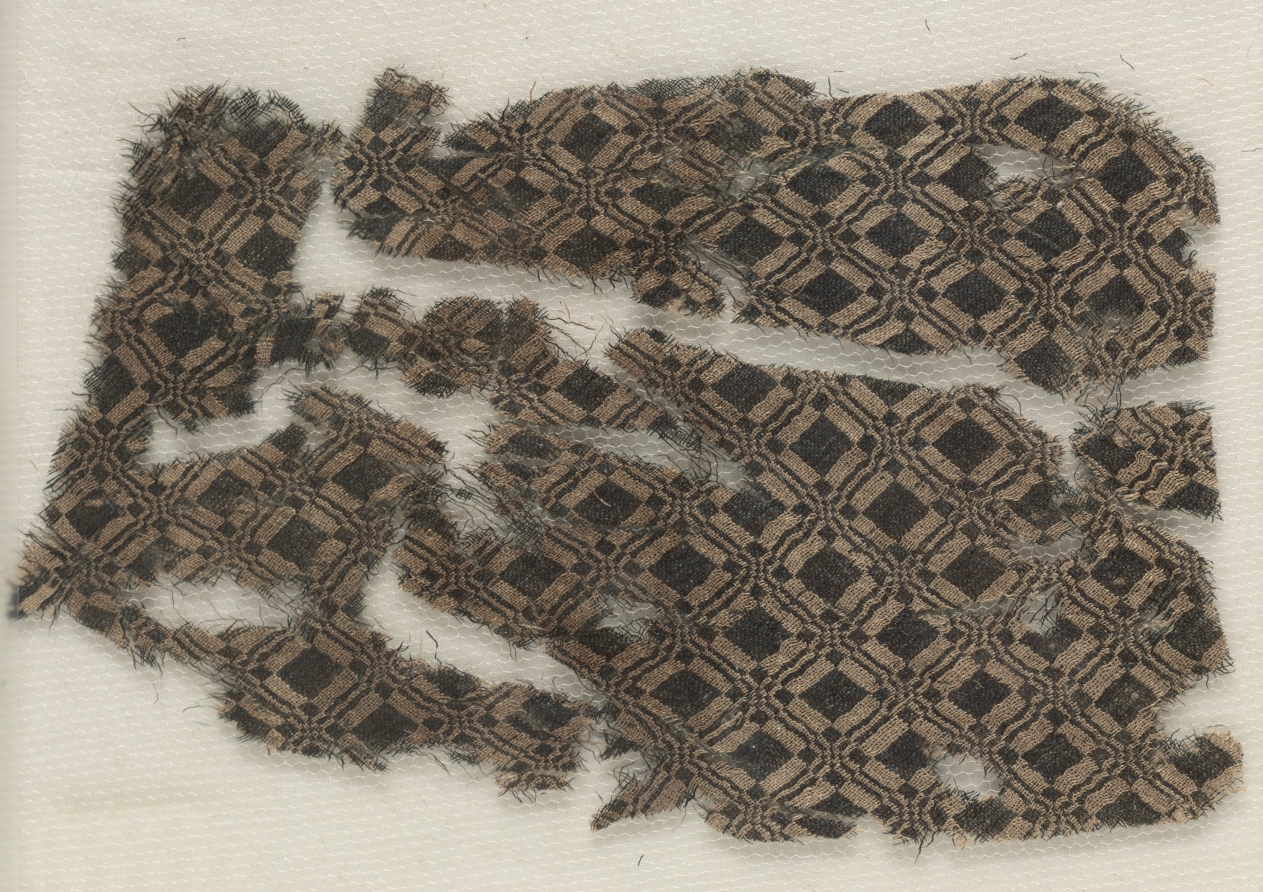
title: Silk Fragment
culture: Egypt, Mamluk sultanate (1250–1517)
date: 1300s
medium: tabby weave; silk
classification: Textile